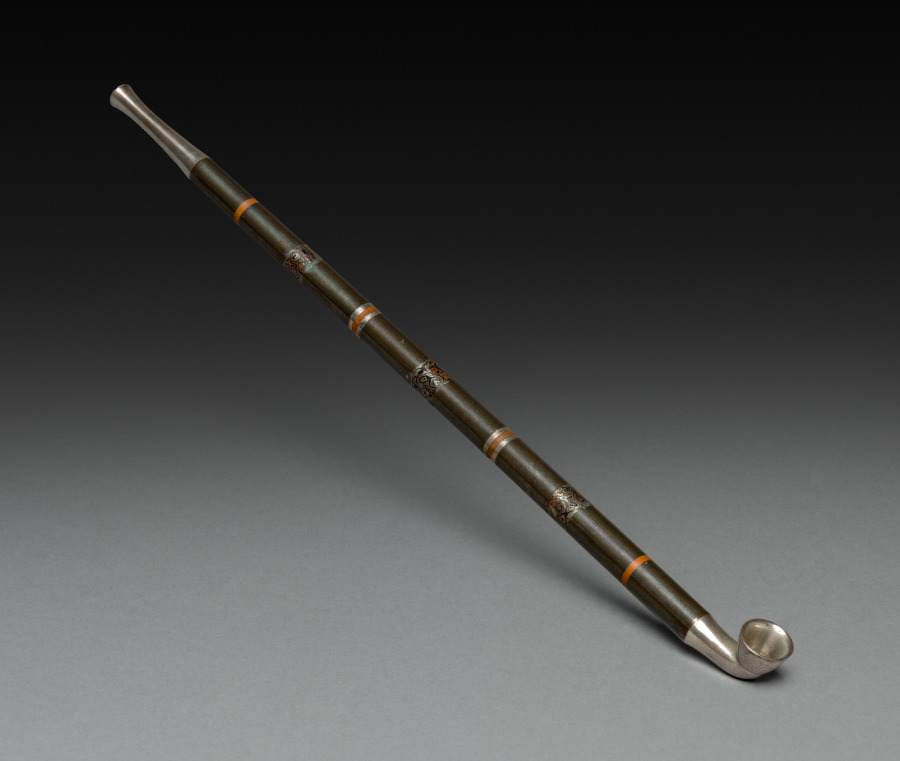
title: Tobacco Pipe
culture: Japan, Edo period (1615–1868)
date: 1700s to mid-1800s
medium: metals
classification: Miscellaneous